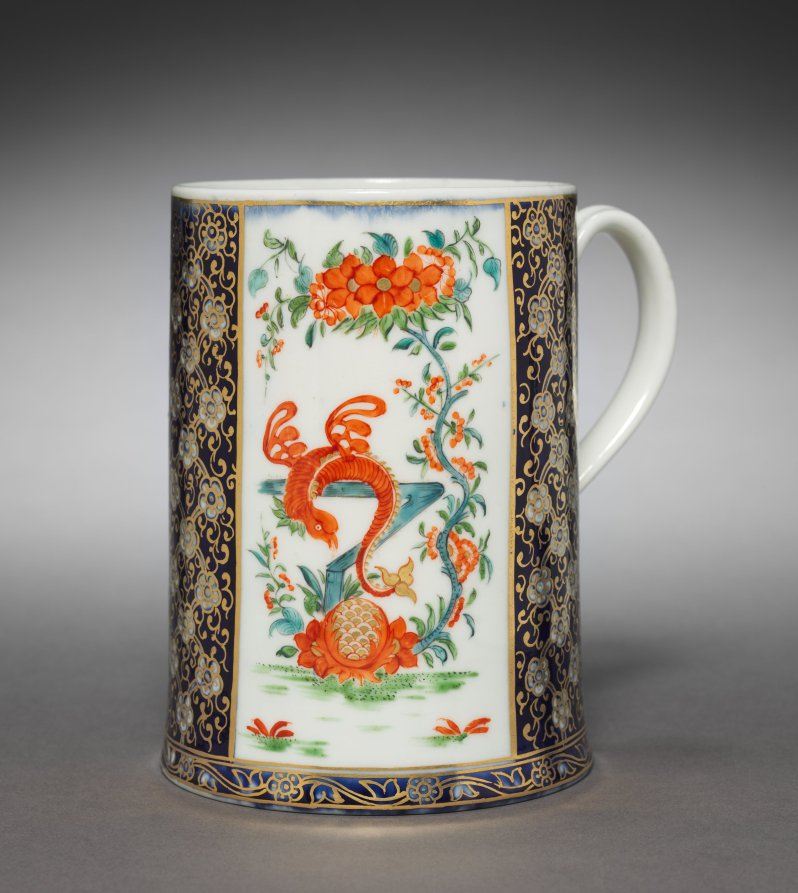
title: Cann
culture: England, 18th century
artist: Chelsea Porcelain Factory (Britain, London, 1745–84)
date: c. 1800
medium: porcelain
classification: Ceramic